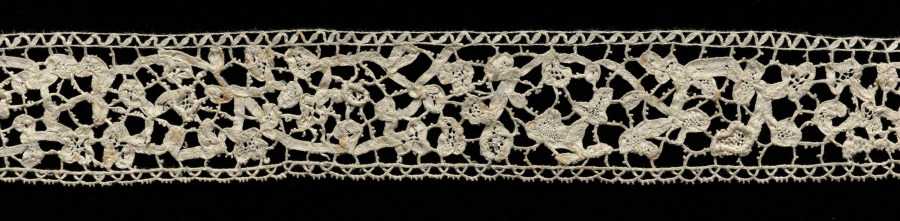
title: Lace Edging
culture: Unassigned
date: 1800s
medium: Linen: bobbin lace braid, needle lace brides picotée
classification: Lace